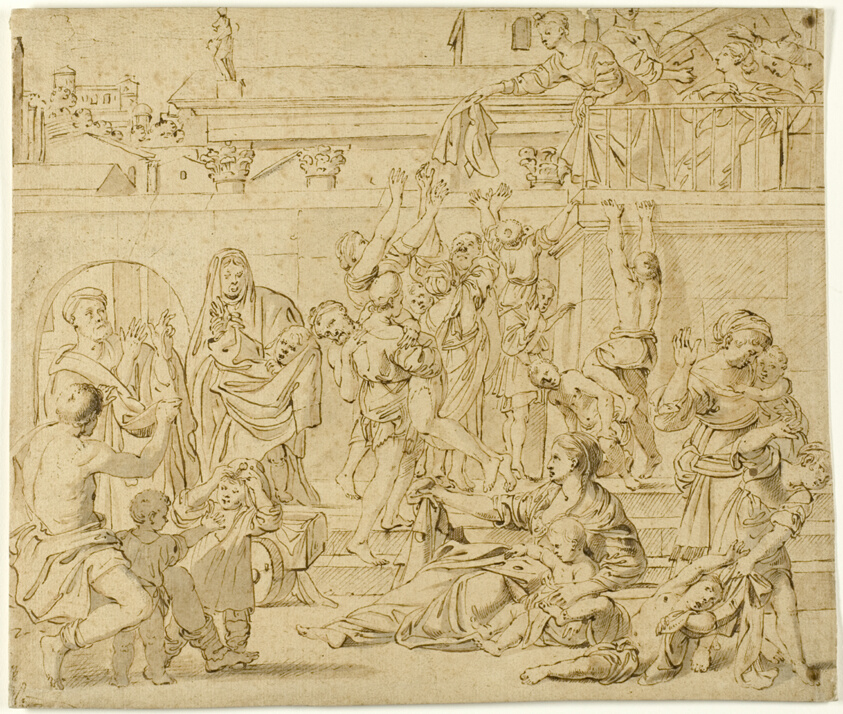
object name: Drawing and Watercolor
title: Saint Cecilia Distributing Alms to the Poor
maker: Domenichino, after; Italian, 1581-1641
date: after 1615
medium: Pen and brown ink, with brush and brown wash, over red chalk, on tan laid paper, laid down on ivory laid paper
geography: Italy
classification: drawings (visual works); prints and drawing